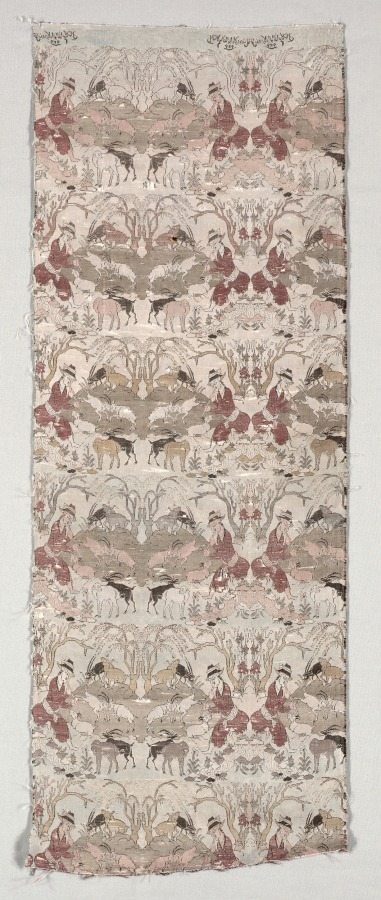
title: Silk Textile with Goatherds in a Landscape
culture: Iran, Isfahan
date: 1900s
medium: Silk: lampas weave; lining: twill tapestry, double locked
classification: Textile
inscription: Work of the servant of the court, Abu al-Qasim Kashani, year 929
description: This textile has a repeated design of goatherds piping to goats in a landscape setting. At the top is an inscription reading: “Work of the servant of the court, Abū al-Quāsim Kāshānī, year 929.” In the Muslim calendar 929 is equivalent to 1523, but this fabric was woven in the 1900s. This textile emulates examples from the Safavid period (1501–1722), regarded as a high point of Iranian culture. A lampas weave is characterized by the combination of two weave structures with two sets of wefts—the threads over and under which the warp threads are woven. Threads of the pattern weft are laid on top of the background weft to form the design. Lampas is typically woven in silk, sometimes with the addition of metallic thread.